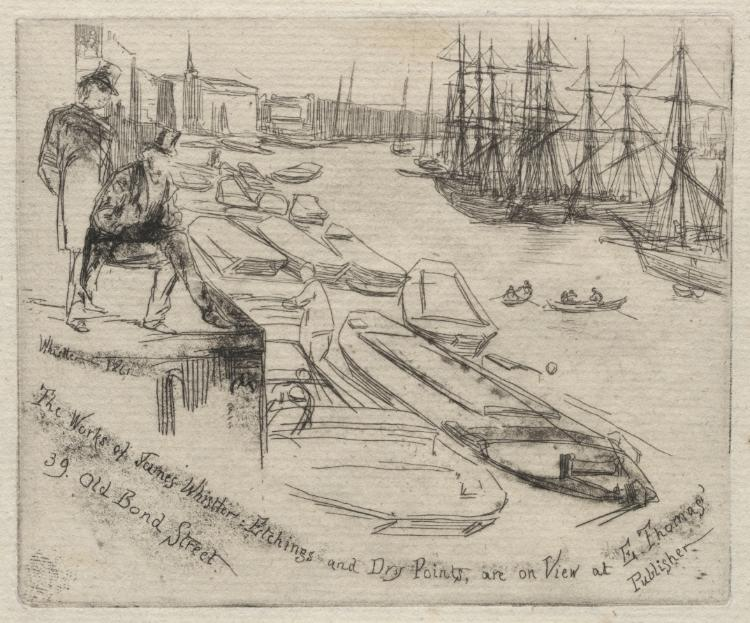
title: The Little Pool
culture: America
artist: James McNeill Whistler (American, 1834–1903)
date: 1861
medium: etching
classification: Print